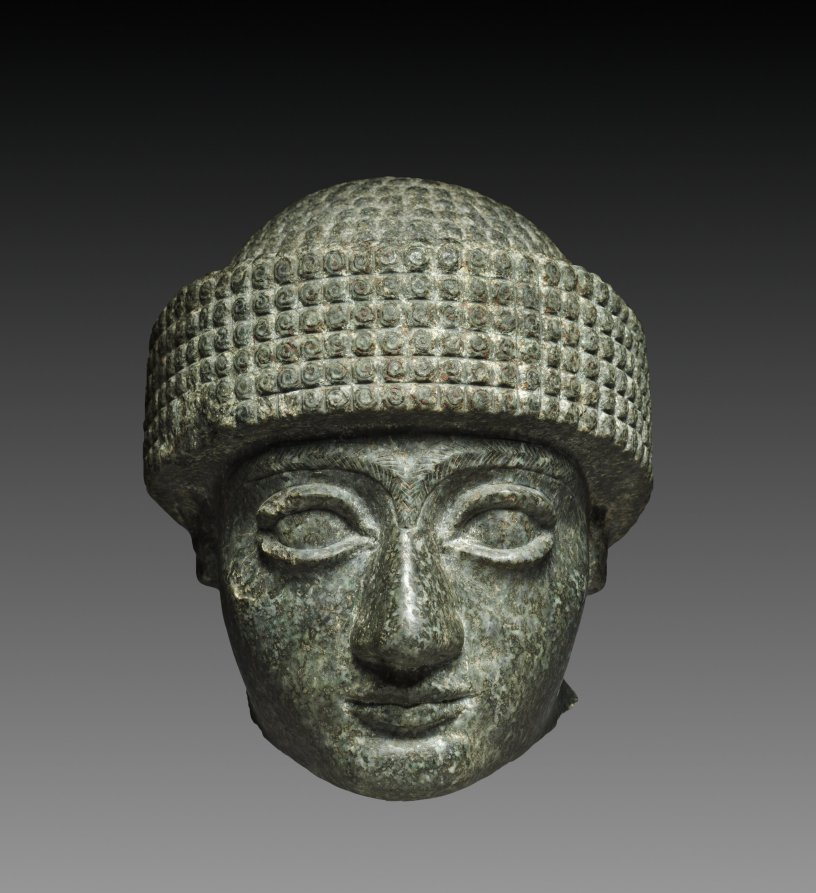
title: Head of Gudea, ensi of Lagash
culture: Mesopotamia, Iraq, Lagash (Tello)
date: 2144–2124 BCE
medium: dolerite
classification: Sculpture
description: Gudea was an ensi or ruler of the southern Mesopotamian city-state of Lagash in the 22nd century BCE. Archaeologists have found over 30 complete and fragmentary statues of his likeness and over 2,400 inscriptions mentioning his name. Gudea was both a political and religious leader, and most of the statues depicting him were housed in temples.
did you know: This head was originally on the body of 1963.154; however, they were separated in 1974 when it was realized they did not belong together.